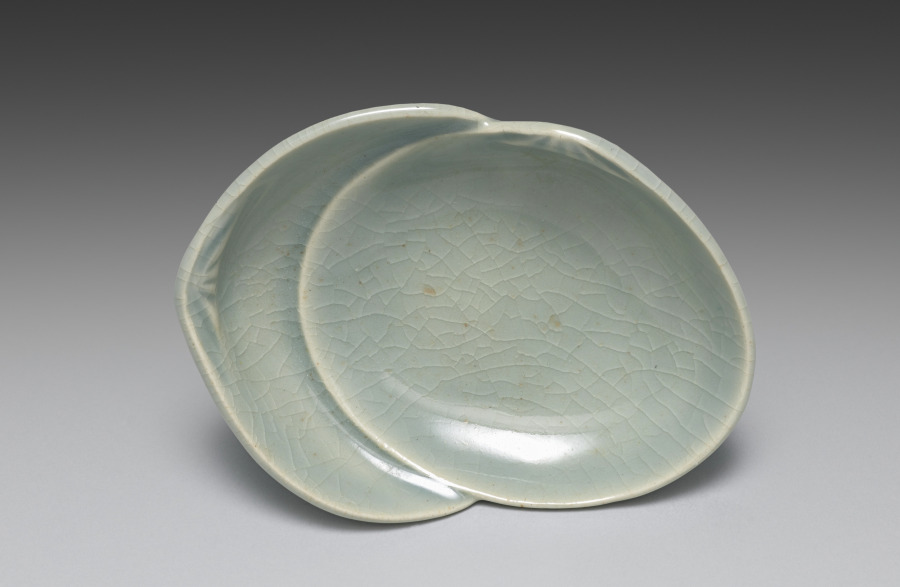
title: Dish from Saucers with Matching Shells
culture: Japan, Meiji period (1868–1912)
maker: Seifū Yohei III (Japanese, 1851–1914)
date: 1893–1914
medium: Porcelain with molded design and green crackled glaze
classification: Ceramic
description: Yohei III’s main output for his sophisticated clientele was in the form of tea sets and dining sets. He created a range of dishes in green glazes. He often produced in pairs, sets of five, or sets of ten. The set of five dishes with a more complex form is described as having a “water-colored glaze” (mizuiroyū). These are shaped like clam half shells, a reference to a game in which shell halves painted with narrative scenes or a variety of motifs must be matched back together by the players. The dishes have molded details to articulate the shell forms, and the crackling across each shell adds another dimension to the surface. Each dish is set on three small feet, formed by a pinched piece of clay and attached to an unglazed area on the underside of the dish. Curiously, while four of the dishes are stamped with the artist’s mark, one has instead a signature carved into the base.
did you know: The saucers are meant to look like matched halves of clam shells in reference to a once popular game.